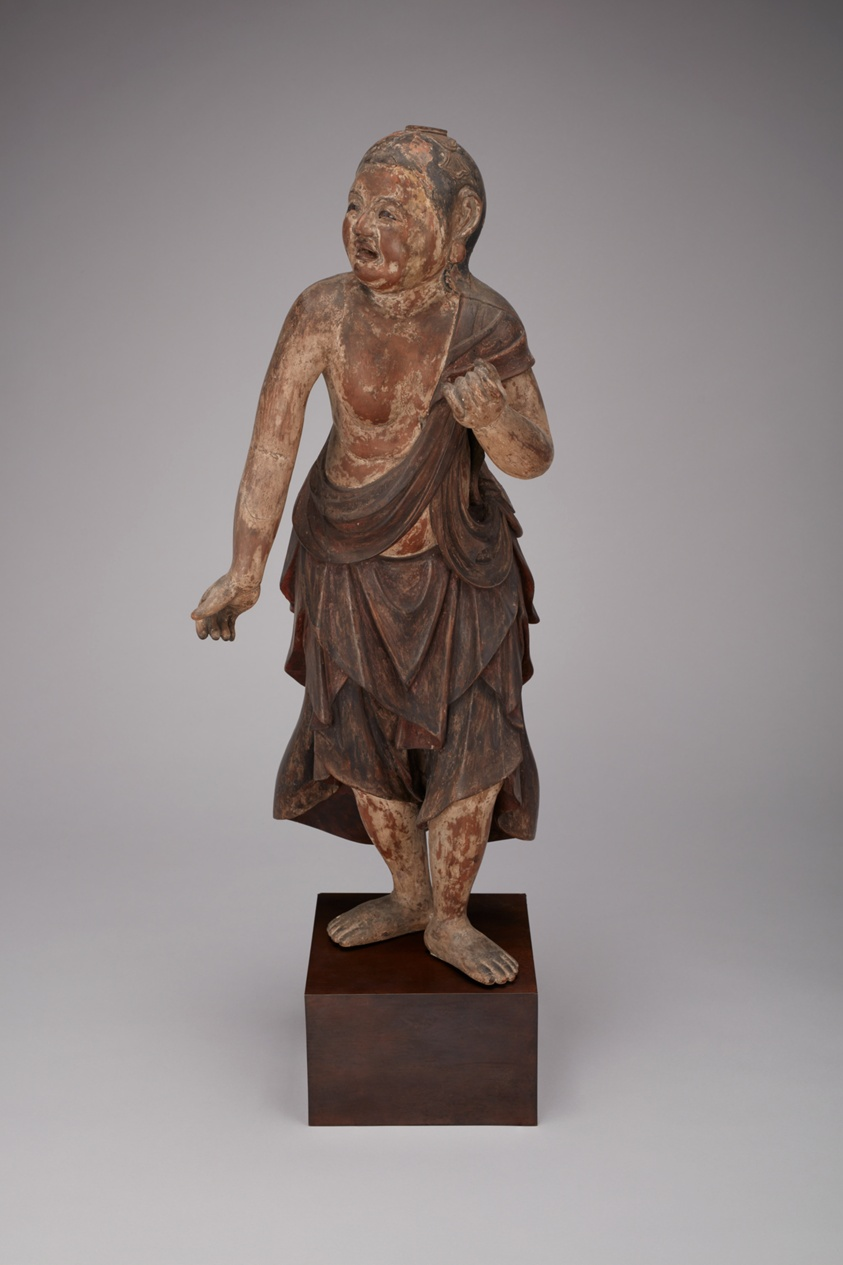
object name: Sculpture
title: Seitaka Dôji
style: Japanese (culture or style)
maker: Japan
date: 13th century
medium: Wood with traces of polychromy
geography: Japan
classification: wood; sculpture; asian art